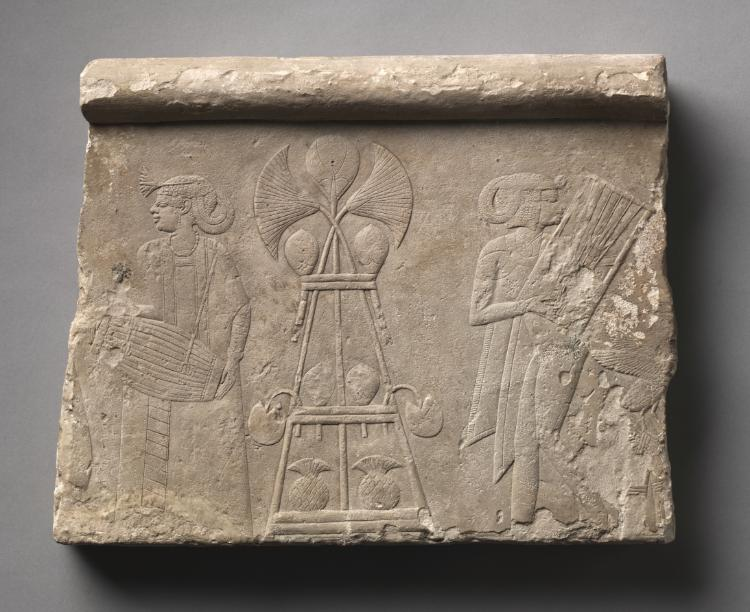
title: Fragment of a Lintel: Hapiu's Female Musicians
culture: Egypt, Late period (715–332 BCE), Dynasty 30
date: 380–343 BCE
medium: limestone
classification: Sculpture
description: This fragment of relief formed part of a lintel over the door of a small niche or shrine in the tomb of a man called Hapiu. Two female musicians are shown on either side of a large stand bearing a floral arrangement. The first woman, wearing a long coat, beats a drum; the second, scantily clad, plucks a lyre, dancing as she plays.